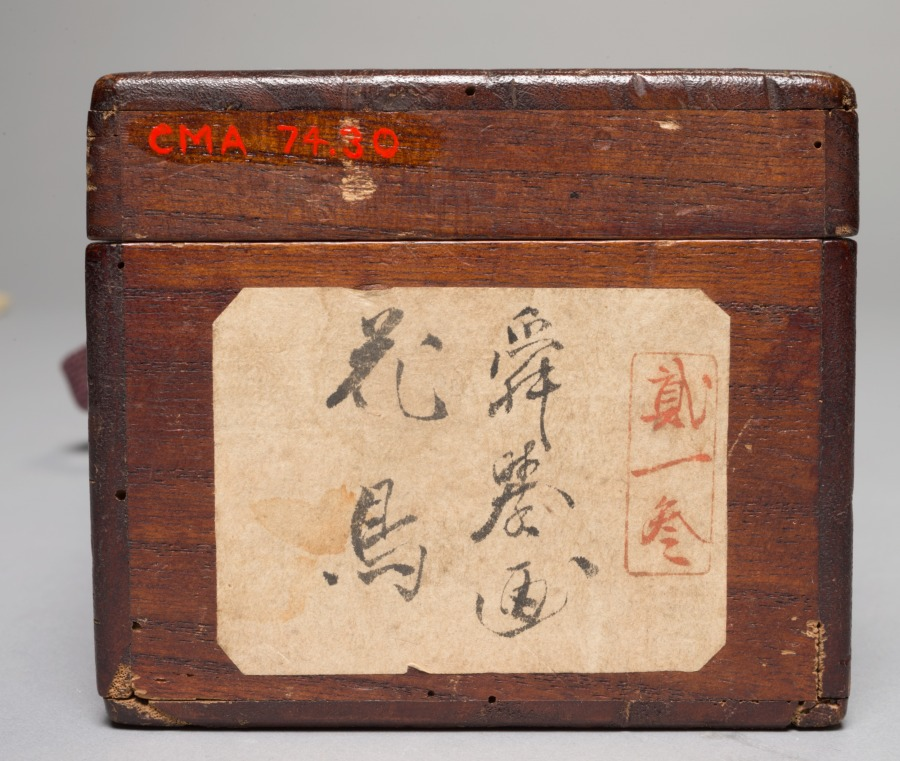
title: Crow on a Pomegranate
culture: Japan, Muromachi period (1392–1573)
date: 1500s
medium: hanging scroll; ink on paper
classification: Painting